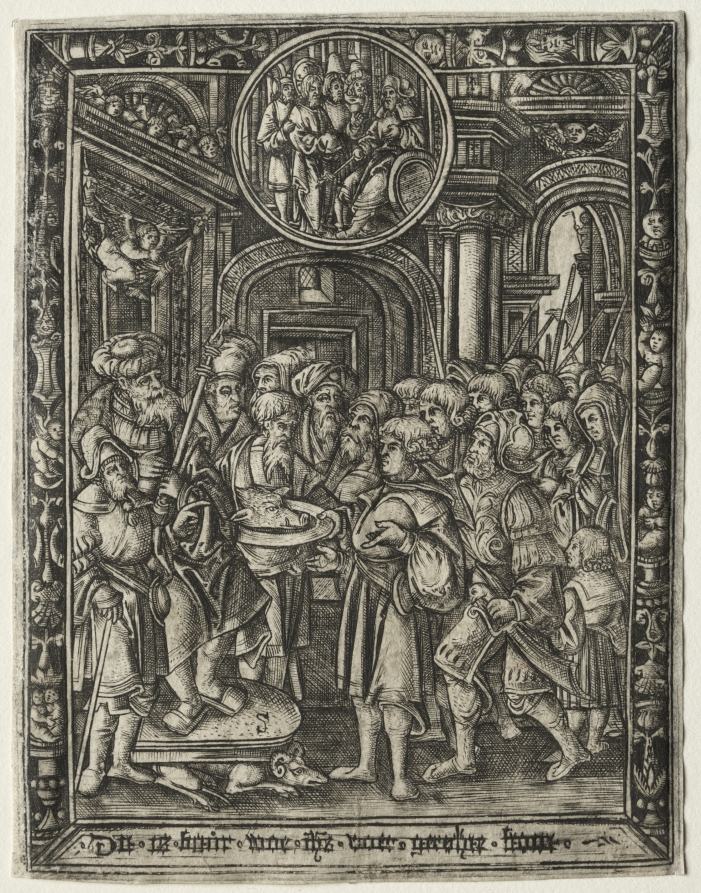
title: The Old King on His Throne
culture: Flanders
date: c. 1520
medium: engraving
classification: Print